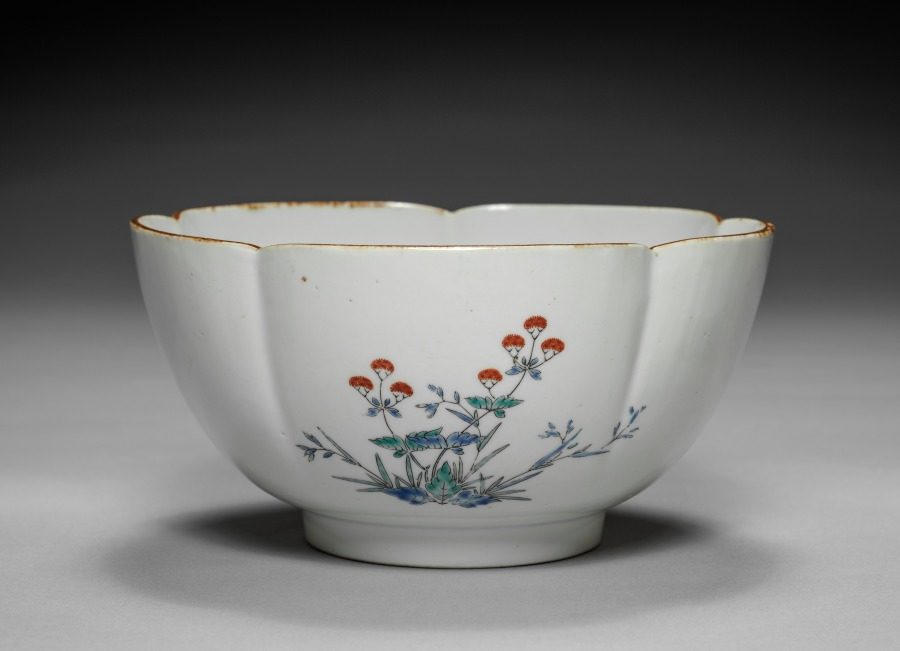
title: Bowl with Butterflies and Flowers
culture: Japan, Edo period (1615–1868)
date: c. 1700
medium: porcelain molded in five lobes, with overglaze color enamel (Hizen ware, Kakiemon type)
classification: Ceramic